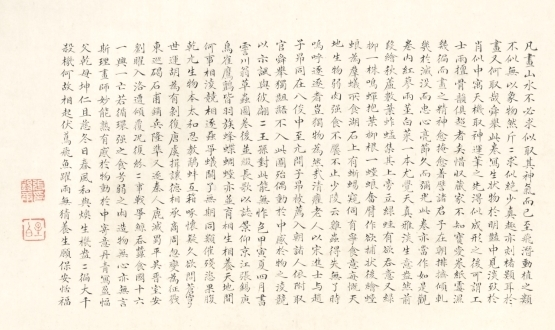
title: Insects and Flowers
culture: China, Qing dynasty (1644-1911) or Republican period (1912-49)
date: c. 1900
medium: Handscroll, ink and color on paper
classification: Painting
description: More than 26 feet long, this scroll presents insects, reptiles, and plants in delicate brushwork and pale colors, referring in style to earlier Southern Song dynasty (1127–1279) bird-and-flower paintings. Upon closer inspection, ants dismember a butterfly and reptiles wait to ambush their prey. An inscription at the end of the painting gives us an idea of its meaning: Attributed to the Qing dynasty scholar Zhang Xigeng (張錫庚, 1801–1861), the inscriber relates the work to an earlier painting by Qian Xuan (錢選, c. 1235–before 1307) and further suggests that the painting may allude to the relentlessness of natural selection. By drawing a parallel to tumultuous episodes in Chinese history, the writer might even hint at the domestic rebellions and the aggression of Western powers against China in his lifetime, particularly the Opium Wars (1839–60).